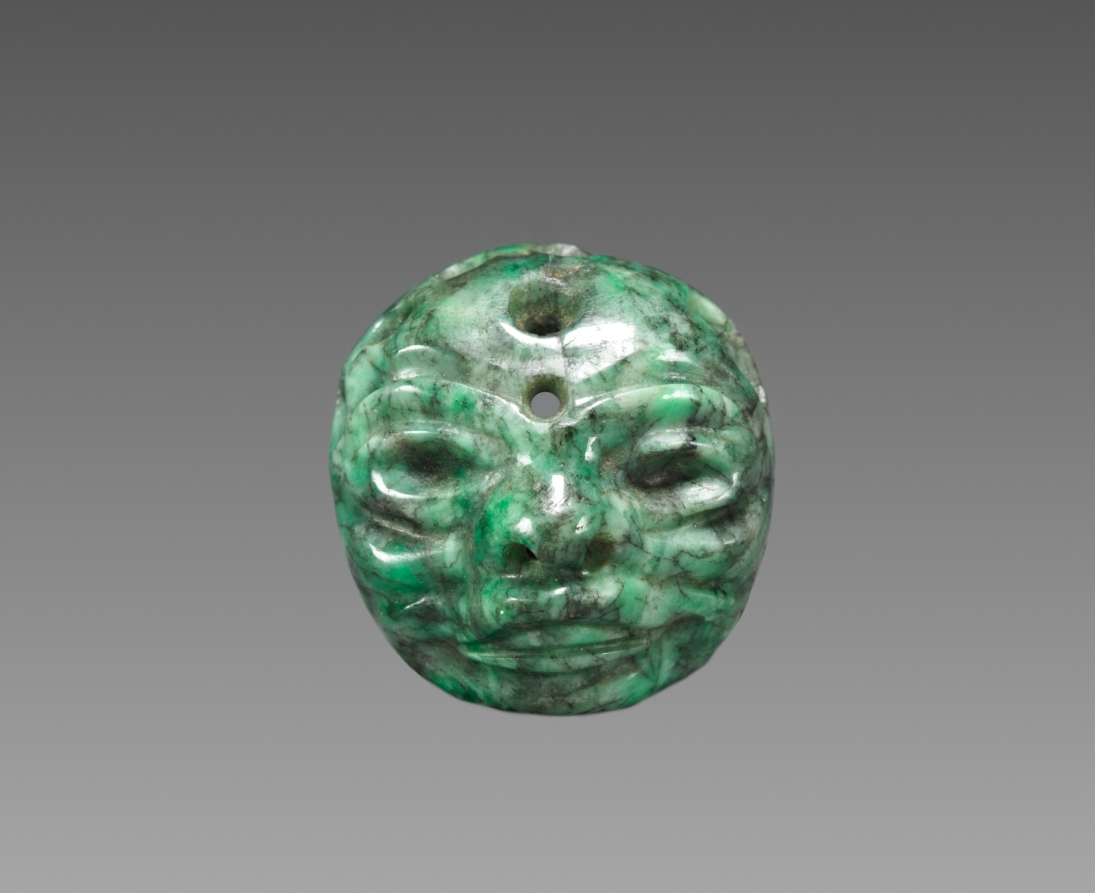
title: Mask Ornament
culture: Mesoamerica, Mexico, Olmec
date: c. 900–400 BCE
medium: jade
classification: Jade